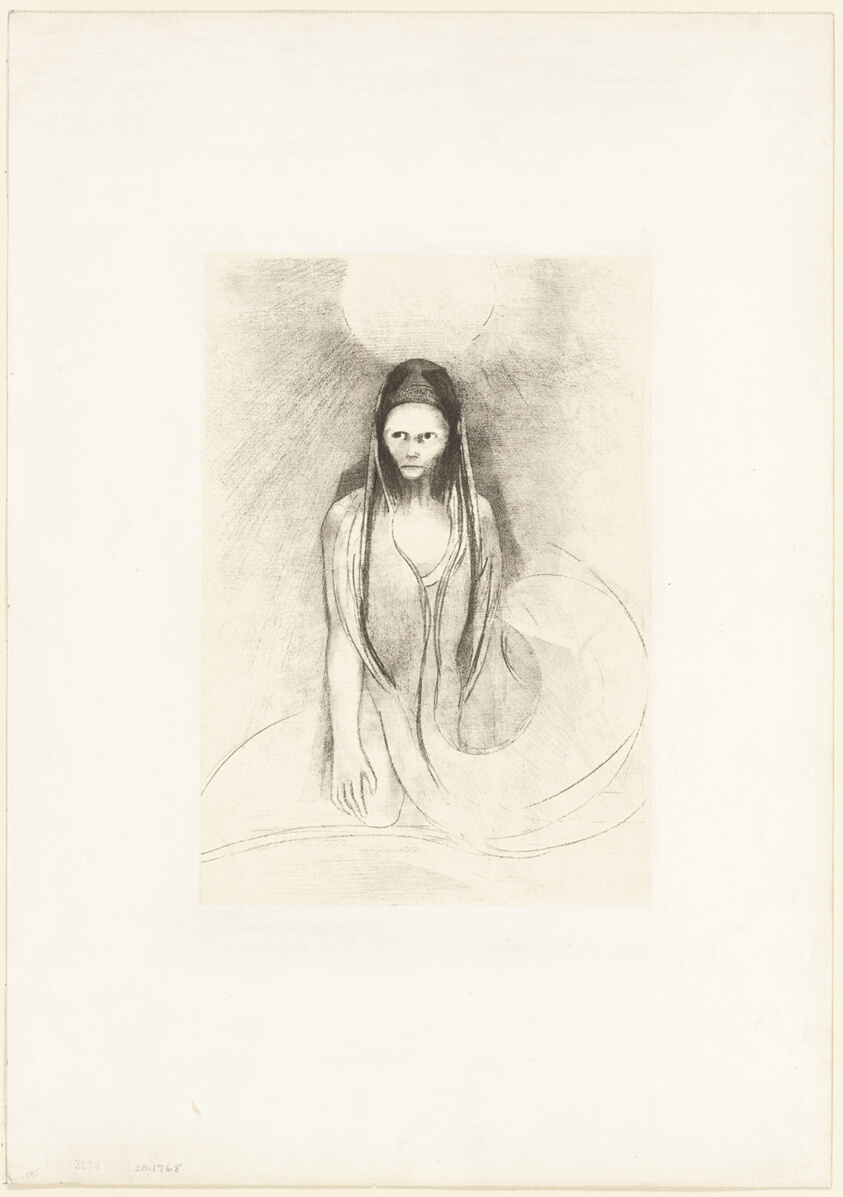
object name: Print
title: Intelligence was Mine! I Became the Buddha, plate 12 of 24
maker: Odilon Redon (French, 1840-1916)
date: 1896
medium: Lithograph in black on cream China paper laid down on ivory wove paper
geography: France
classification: lithograph; print; prints and drawing; paper